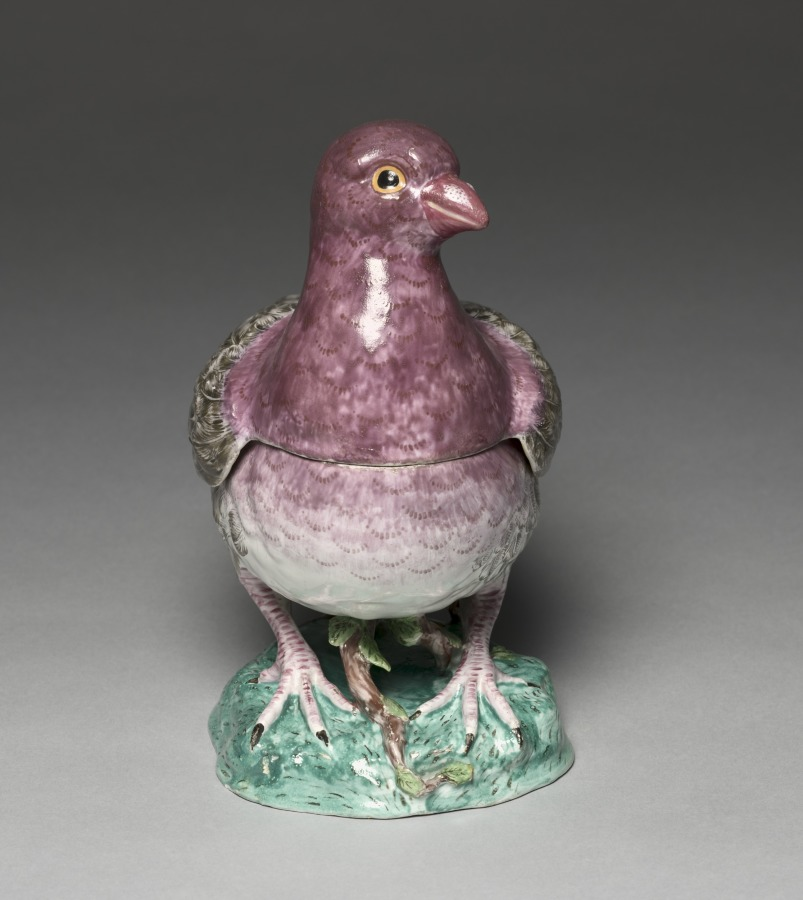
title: Covered Tureen in the Form of a Pigeon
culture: France, 18th century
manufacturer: Sceaux Factory (French, active 1748–66)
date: c. 1760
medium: Tin- glazed earthenware (faience) wth enamel decoration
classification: Ceramic